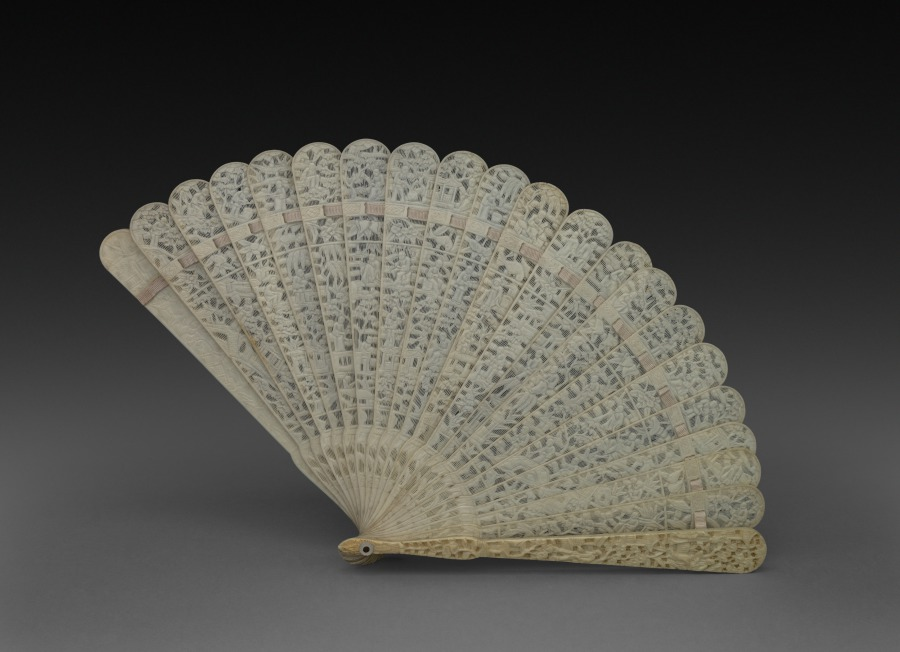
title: Fan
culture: China, Qing dynasty (1644-1911)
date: 1644–1911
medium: ivory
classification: Ivory